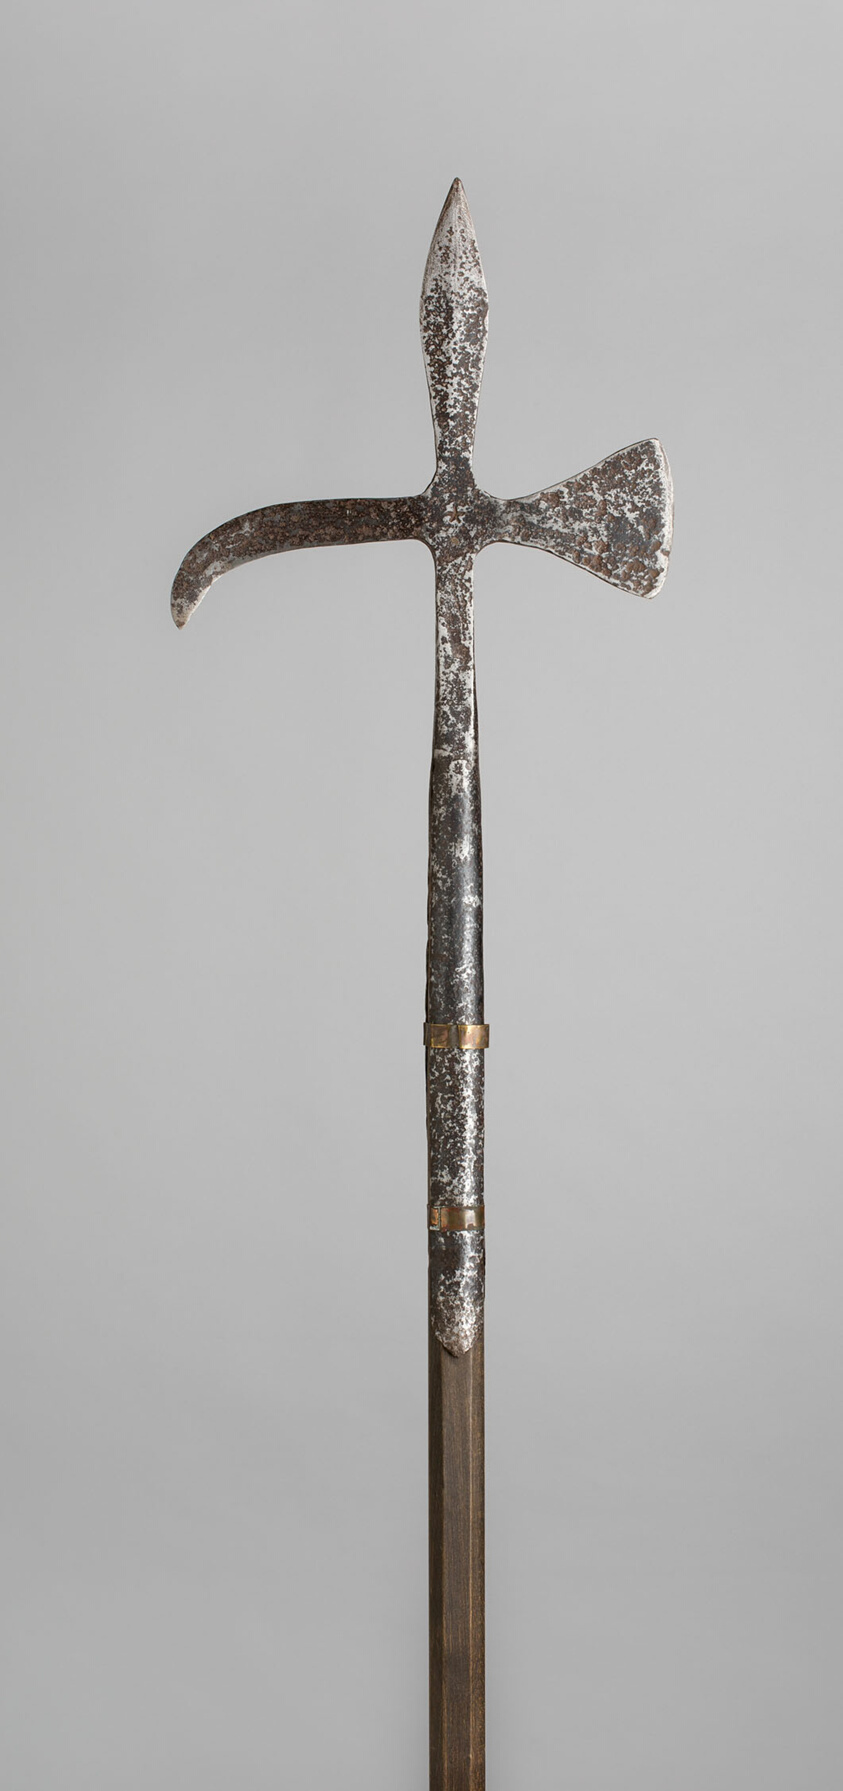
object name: Arms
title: Poleaxe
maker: European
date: 19th century in the late medieval style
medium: Steel and wood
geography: Europe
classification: edged weapon-staff; arms; arms and armor